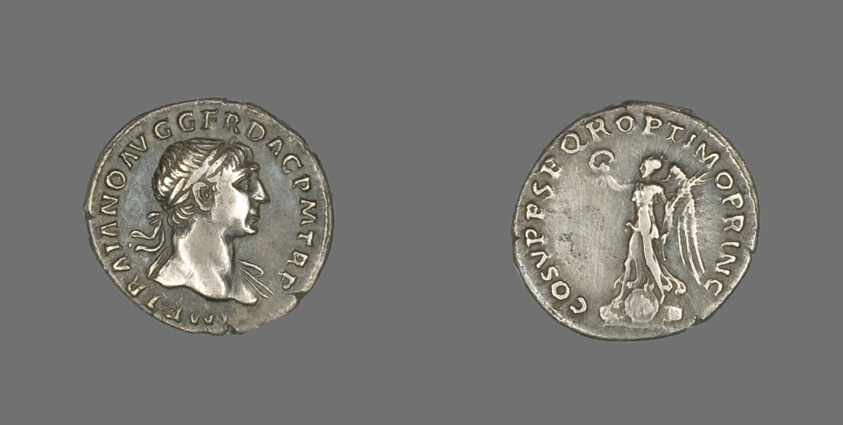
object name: Coin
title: Denarius (Coin) Portraying Emperor Trajan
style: roman (ancient, style or period)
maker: Roman, minted in Rome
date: 103-111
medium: Silver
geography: Roman Empire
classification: coin; ancient art